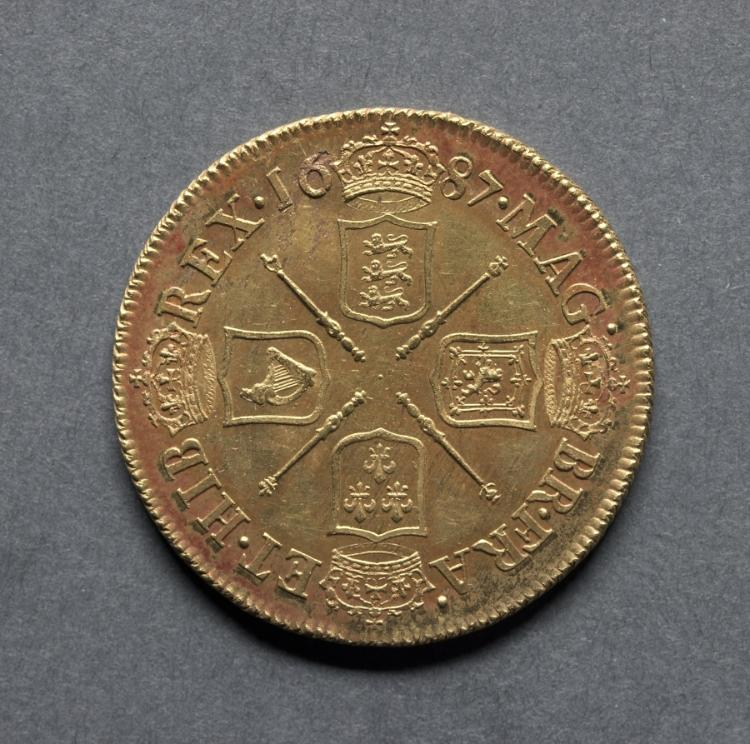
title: Two Guineas: Four Crowned Shields of Arms and Scepters (reverse)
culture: England, James II, 1685-1688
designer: John Roettier (British, 1631–1703)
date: 1687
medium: gold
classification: Coins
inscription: MAG . BR . FRA . ET . HIB . REX . 1687 .